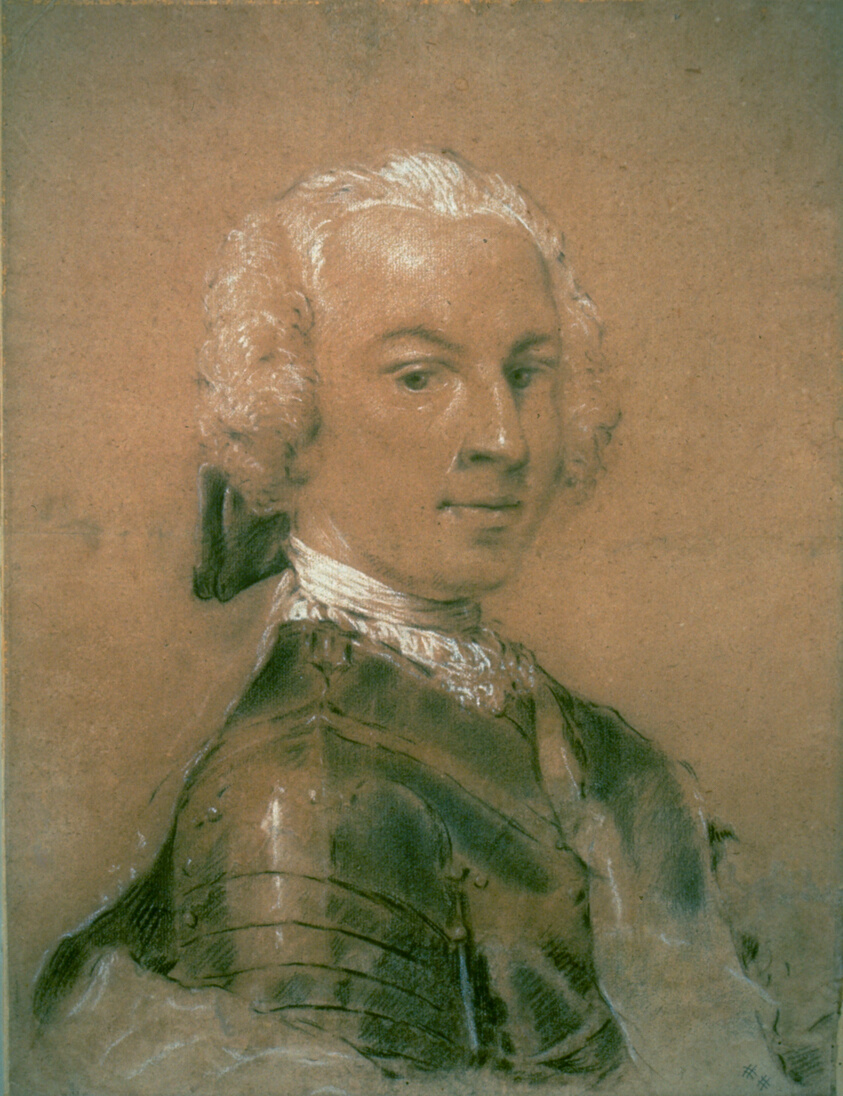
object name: Drawing and Watercolor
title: A Portrait of Ferdinand Ludwig, Count von Oeynhausen-Schulenburg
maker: Giovanni Battista Piazzetta (Italian, 1682-1754)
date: c. 1730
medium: Black chalk with stumping, and with traces of charcoal, heightened with touches of white chalk, on blue-gray laid paper (discolored to tan), laid down on cream wood pulp board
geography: Italy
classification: chalk; drawings (visual works); prints and drawing